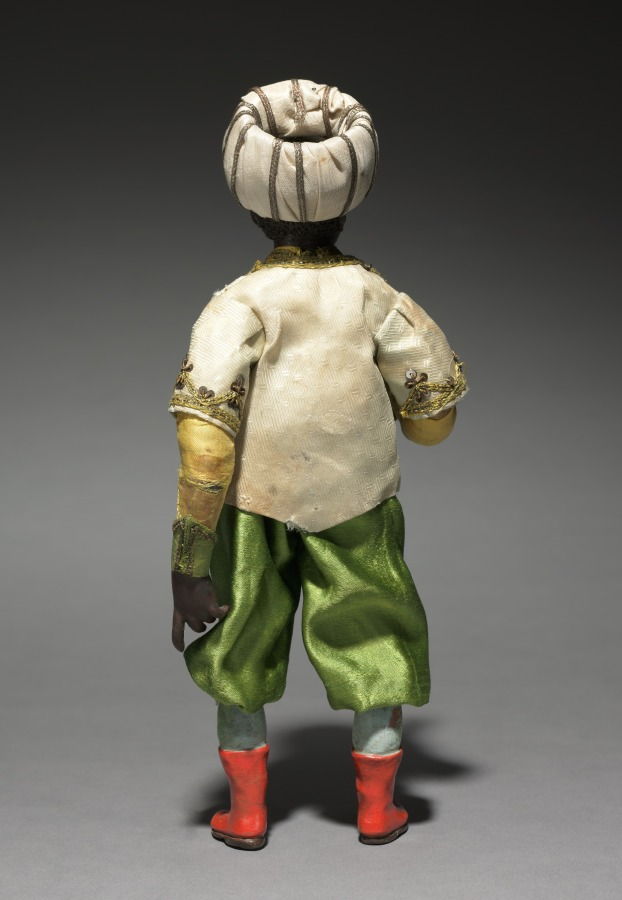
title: Figure from a Crèche: Attendant of the Magi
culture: Italy, Naples, late 18th-early 19th century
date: 1780–1830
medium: painted wood and terracotta with various textiles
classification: Sculpture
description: The practice of creating scenes of the Nativity for the home dates from the early 1700s in Italy, where people began to set up doll-like figures of about a foot or less in height. The custom was particularly popular in Naples around 1800, where crèche scenes (crèche means cradle, or crib) included many figures, whose heads and hands of painted terracotta, stuffed cloth bodies, and clothing adapted from contemporary local costumes gave them an amazingly realistic character. Representations of the birth of Jesus can be traced to the first few centuries of Christianity. Both living creatures and sculptural depictions of them were used from early times. By the late middle ages it was customary to create life-size figures of wood or stone, naturalistically painted, to represent the characters who participated in the events of Jesus's early life. These sculptures were then arranged in scenes illustrating one or both of the most important of these events, the Adoration of the Shepherds and the Adoration of the Magi-the three kings from the East who came to pay homage to the Christ child. Used in churches, these large figures were especially popular in Italy, Central Europe, Spain, and Portugal.